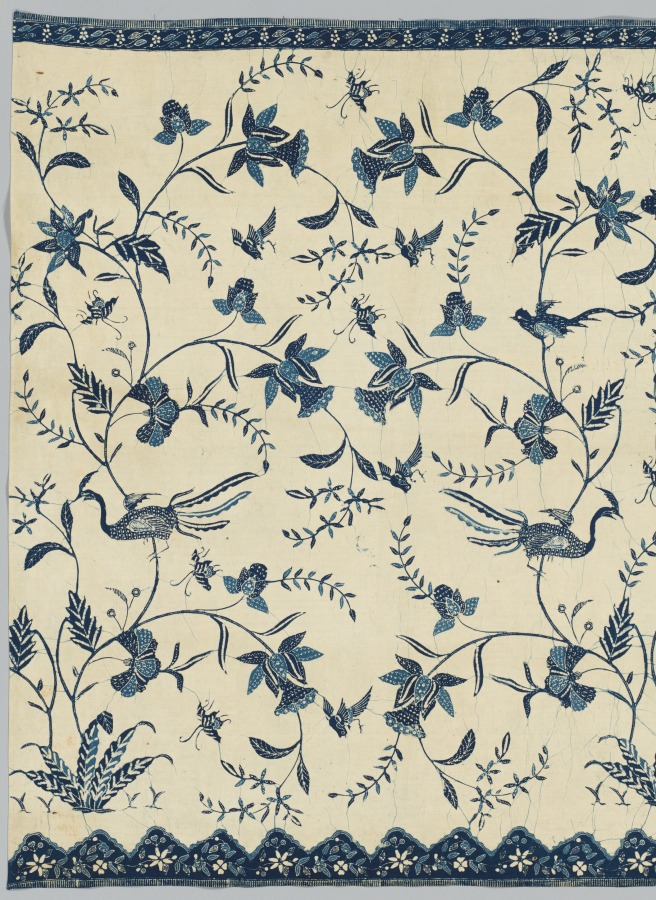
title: Sarong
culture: Indonesia, Java, North Coast, mid-19th century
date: mid-1800s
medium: Cotton: plain weave, wax-resist dyed (batik)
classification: Textile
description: Batiks made in the North Coast region of Java, specifically in Pekalongan, were influenced by both Indian and European motifs due to the Dutch presence in Indonesia. In this sarong we see a mixture of Indian and European flowers including jasmine, lilac, and daffodil. Batik is a wax-resist dyeing technique used throughout Java. Hot wax is applied with a tool known as a canting and a design is hand drawn with incredible skill. This sarong was then dyed with indigo, a well sought after and culturally important natural dye. Areas on the fabric with wax will not accept the indigo dye, hence the term wax-resist.